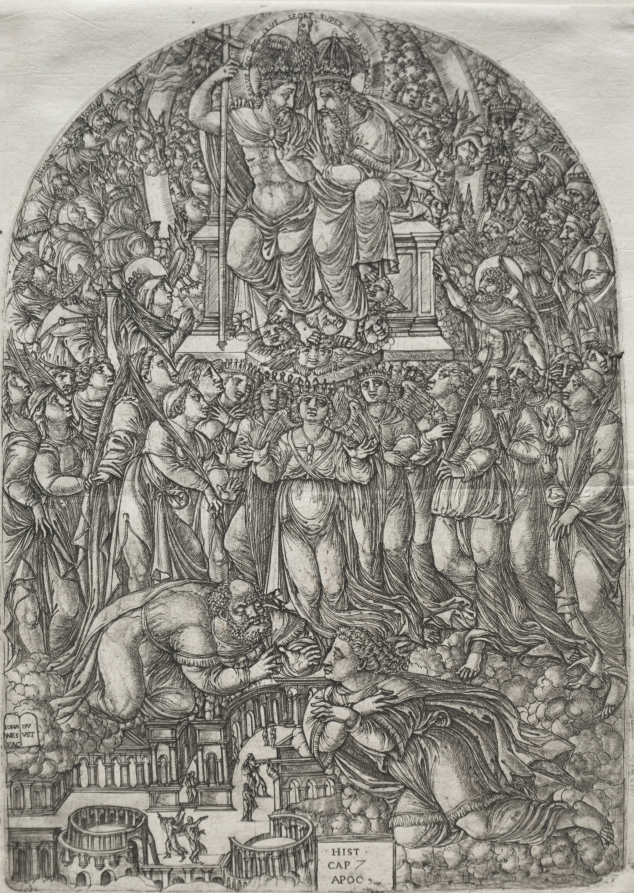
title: The Apocalpse: An Innumerable Multitude which stand before the Throne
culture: France, 16th century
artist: Jean Duvet (French, 1485–1561)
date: 1555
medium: engraving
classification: Print